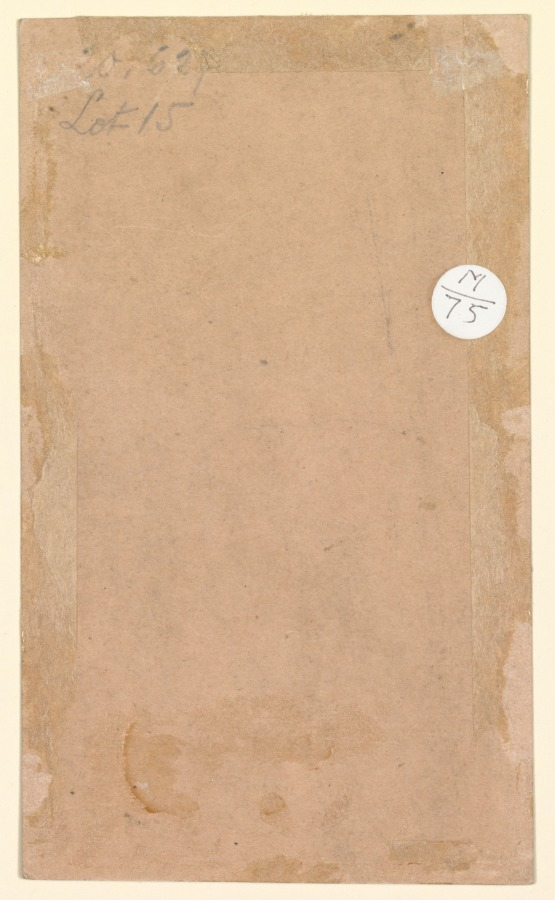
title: A Mughal Prince, Perhaps Danyal, Holding a Sprig of Flowers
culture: Mughal India, court of Akbar (reigned 1556–1605)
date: c. 1580–90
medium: Gum tempera and gold on paper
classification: Painting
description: Prince Danyal (1527–1605), the emperor Akbar’s youngest son, is said to have been his favorite. Danyal served his father as a military officer, leading contingents to the Deccan plateau in southern India, until he succumbed to an untimely death of alcoholism; Akbar himself died later that year. Here, Danyal wears the thumb ring of an archer and grasps a white flower in his hand, recalling his epithet, Nosegay of Fortune’s Spring. In his right hand he holds prayer beads. A sword, knife, and dagger hang from his sash. This early Mughal portrait depicts him as he appeared in his mid-teens.